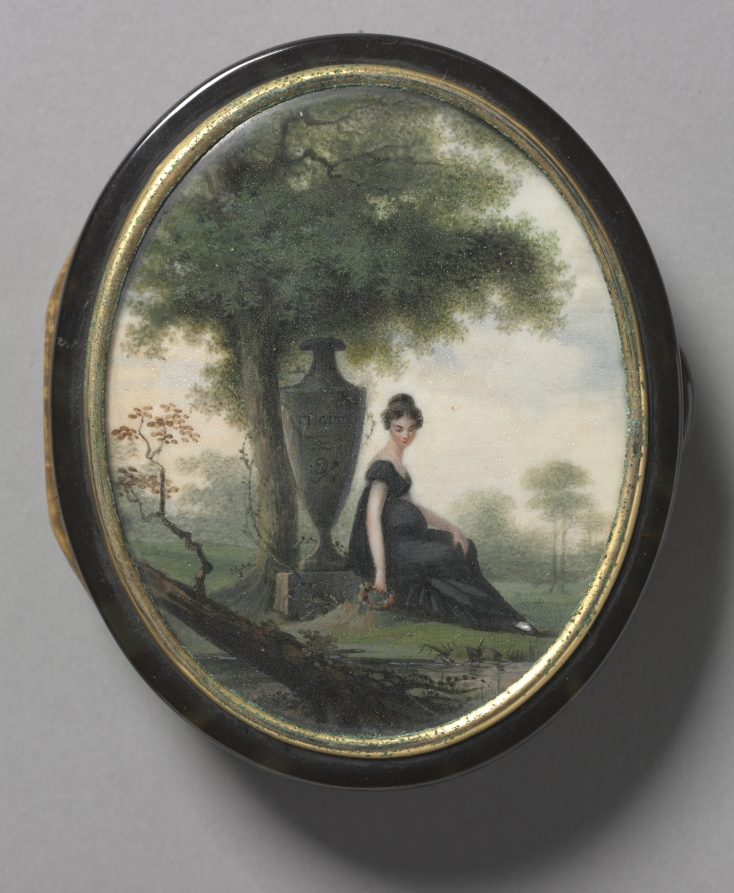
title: Snuff Box with Figures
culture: Continental, (France), late 18th century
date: late 18th century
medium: watercolor on ivory, wood and tortoiseshell with painted miniatues under glass and gilt metal mounts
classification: Miscellaneous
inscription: inscribed on funerary urn: "ci GIT" and below a scull and crossbones.